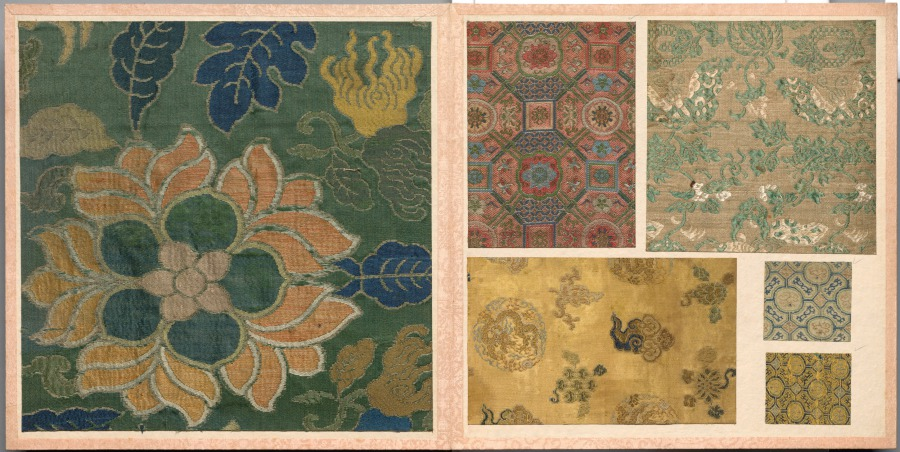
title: Album of Textile Samples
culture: Japan and China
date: 1700s–1800s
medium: silk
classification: Textile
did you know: This album contains 46 pages with 156 mounted Chinese or Japanese textile samples.